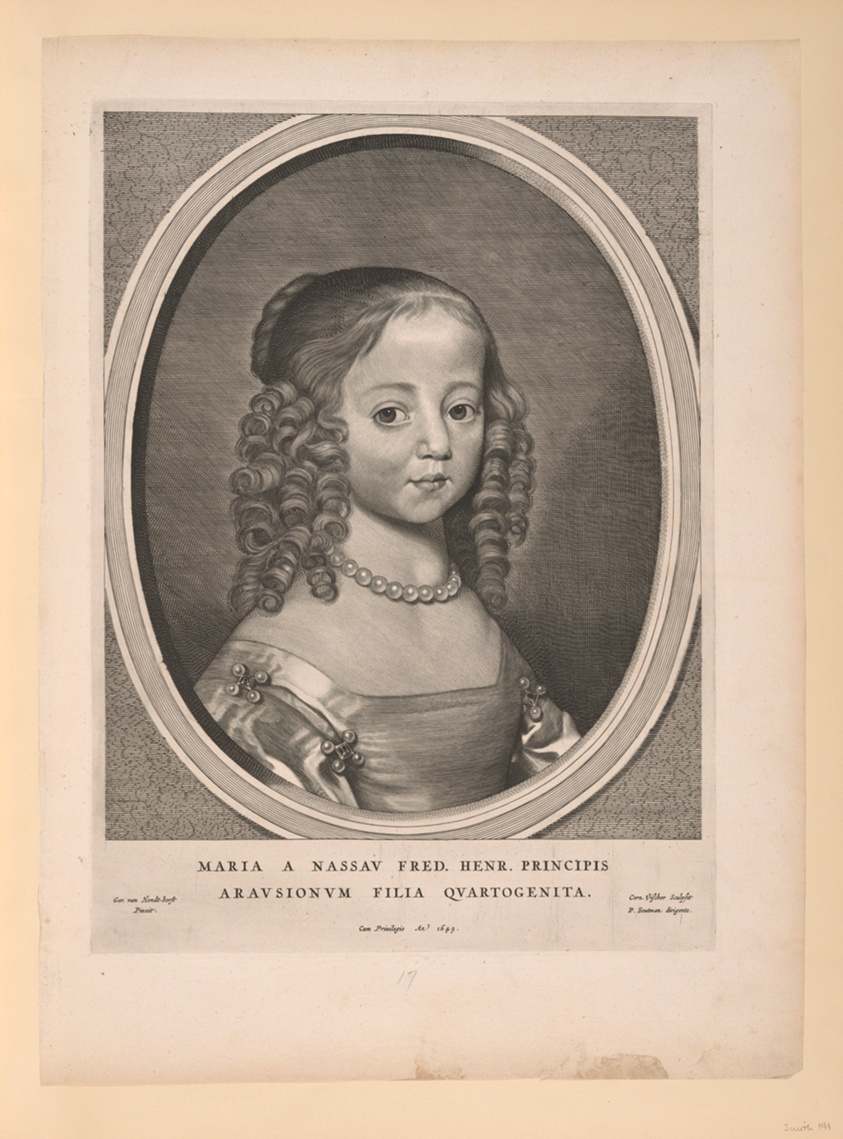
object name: Print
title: Mary, Princess of Orange Nassau, from Nine Portraits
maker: Cornelis Visscher (Dutch, c. 1629-1658); after Gerrit van Honthorst (Dutch, 1592-1656)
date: 1649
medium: Engraving on paper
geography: Netherlands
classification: engraving; paper; print; prints and drawing